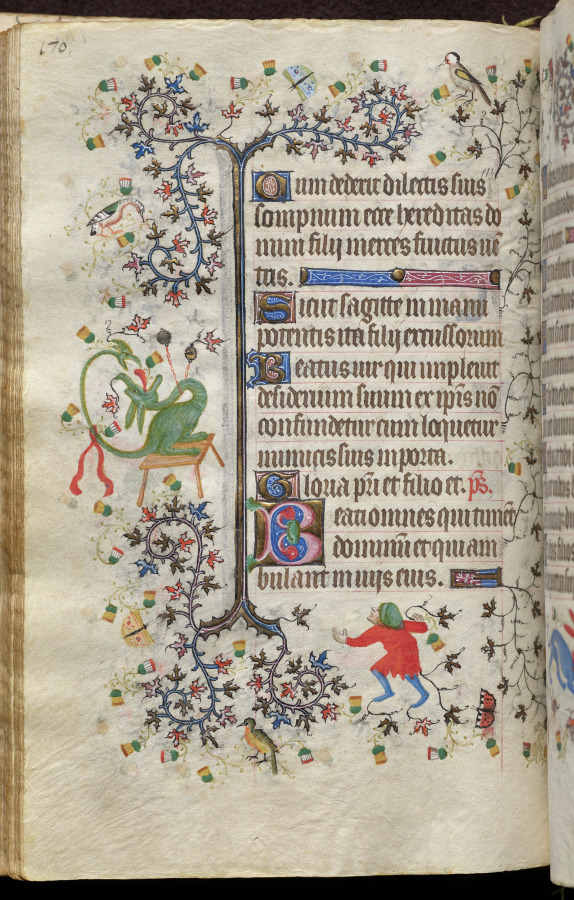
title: Hours of Charles the Noble, King of Navarre (1361-1425): fol. 85v, Text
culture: France, Paris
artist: Master of the Brussels Initials and Associates (French)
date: c. 1405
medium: ink, tempera, and gold on vellum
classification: Bound Volume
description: This precious volume was obviously highly prized by its owner, the French-born King of Navarre, who had his coat of arms painted on no less than twenty folios. Rather than directly commissioning this manuscript from a specific workshop, it seems that Charles the Noble acquired his book of hours -- perhaps ready-made for the luxury market -- while on a trip to Paris in 1404-05. A collaborative effort, six painting styles are evidenced within the pages of this codex, those of two Italians, two Frenchmen, and two Netherlanders. The painter who was responsible for the planning and decoration of the book, and who produced seventeen of the large miniatures, was a Bolognese artist known as the Master of the Brussels Initials. His principal assistant, responsible for most of the borders, was a Florentine who signed his name "Zecho" da Firenze on folio 208 verso.